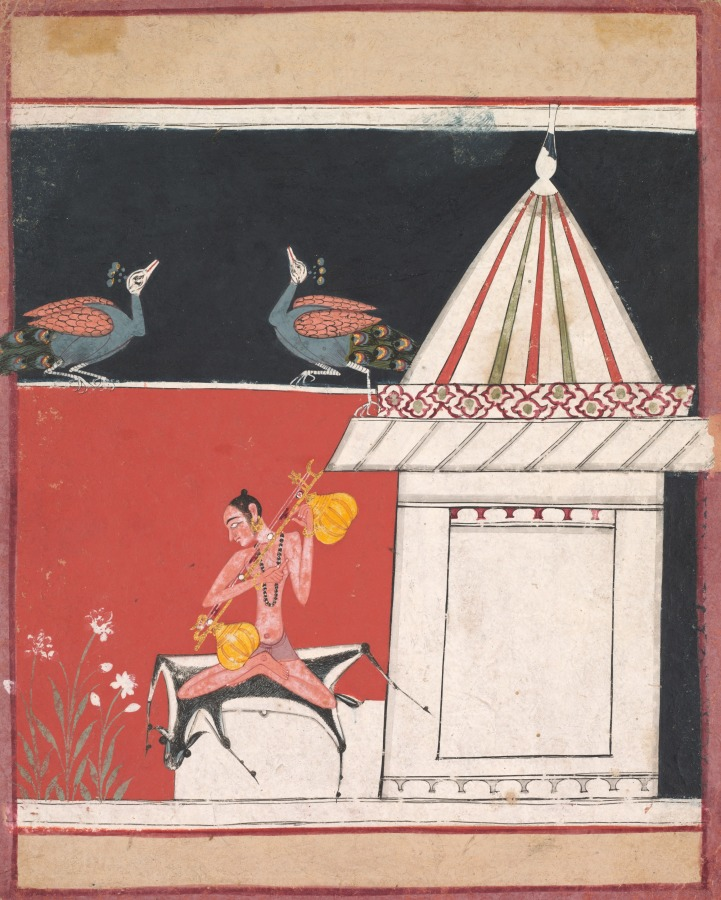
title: Kedara Ragini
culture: Central India, Rajasthan, Malwa school, 17th century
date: c. 1650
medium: ink and color on paper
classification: Painting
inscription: On reverse is seal of Datia state and seven-line inscription: "The heroine Kedara, longing for her lover, has assumed the character of a yogi and waits intently for his return. She has smeared ash all over her body, which is reduced to a skeleton. Absorbed in love, she sings her lord's praise. In this yogic garb, her body is terrifying and looks like a male body. She sees that night seems to be prolonged and anticipates dawn eagerly. Lovesickness is killing Kedara."1 (This translation is paraphrased from V. Dwivedi, 1968, p. 27; in his article, Dwivedi gives a longer translation in addition to contextual information.)